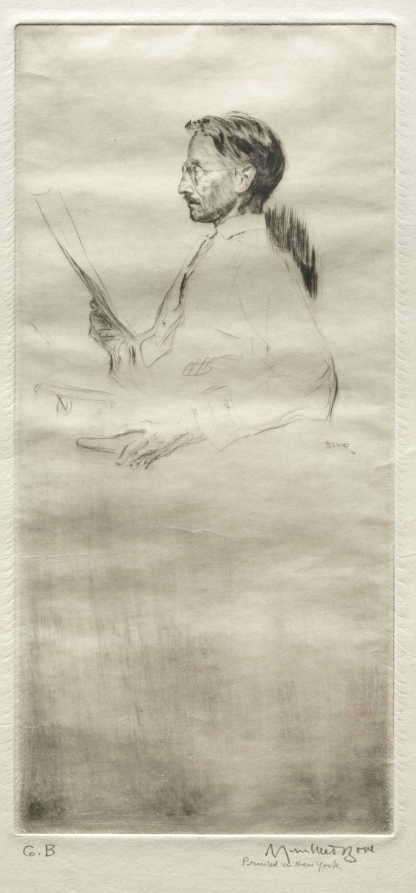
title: Frank Weitenkampf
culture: England, 20th century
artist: Muirhead Bone (British, 1876–1953)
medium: drypoint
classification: Print